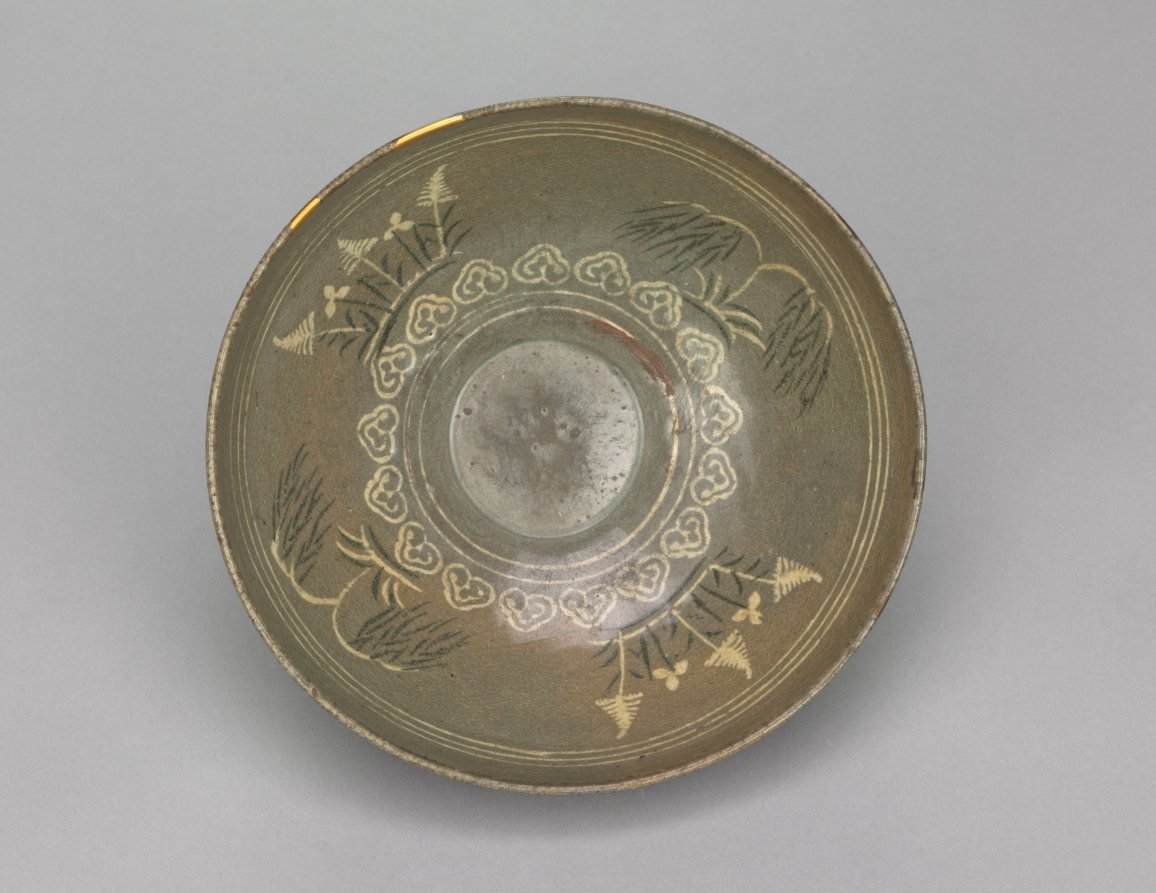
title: Bowl with Willow and Reed Design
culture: Korea, Goryeo dynasty (918–1392)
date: 1300s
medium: pottery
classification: Ceramic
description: A wide bowl like this example was especially suitable for drinking powdered tea shaved from a compressed tea cake, the most commonly enjoyed type during the Goryeo period. The inlaid image of weeping willow trees appears as a main decoration pattern on the inner wall of this bowl.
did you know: This bowl with a lightly bent inward rim possibly takes the shape of an alms bowl by Buddhist monks.